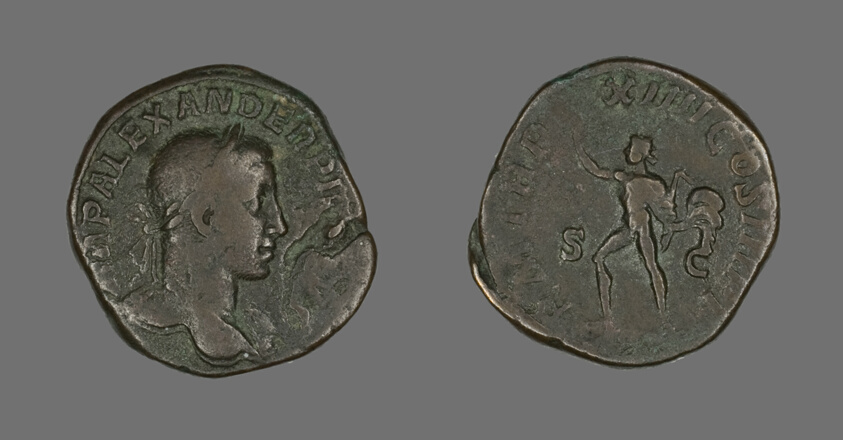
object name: Coin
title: Coin Portraying Emperor Severus Alexander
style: imperial (roman), ancient, roman (ancient, style or period)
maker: Roman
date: 235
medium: Bronze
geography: Roman Empire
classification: coin; struck; ancient art